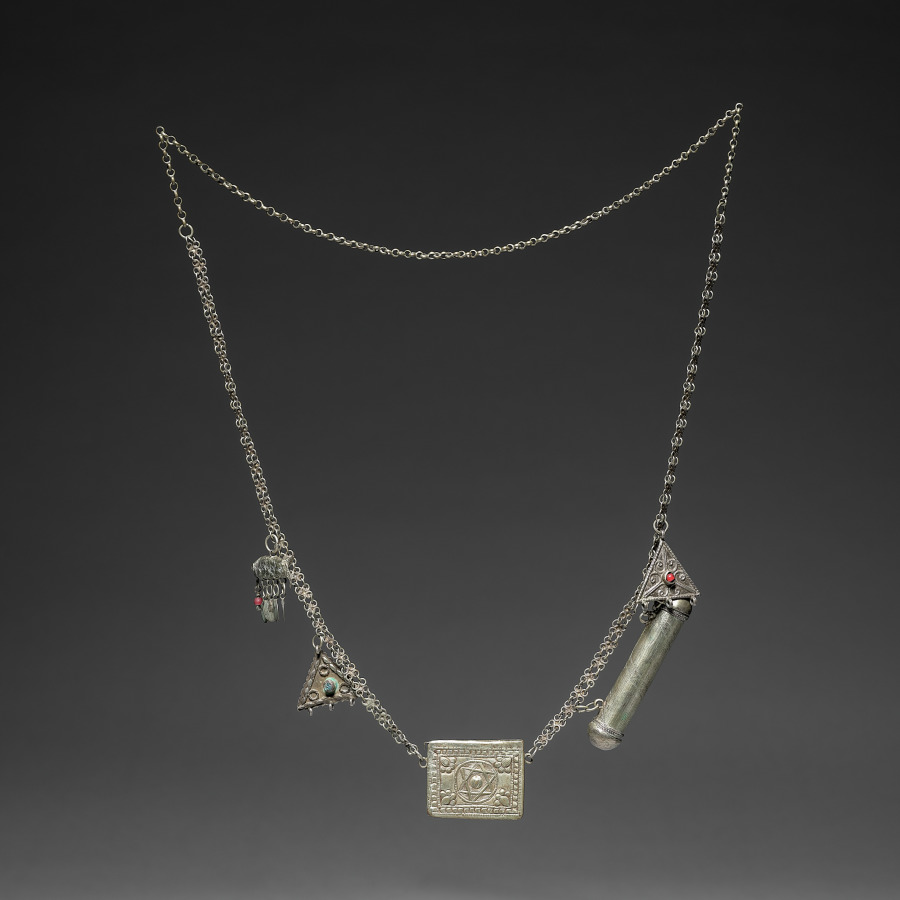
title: Chain with Two Charm Cases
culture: India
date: 1800s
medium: silver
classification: Jewelry